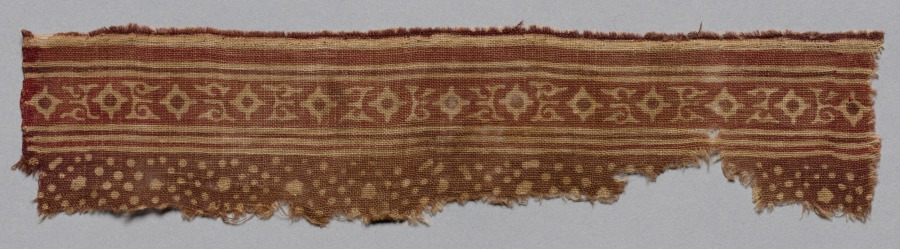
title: Fragment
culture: India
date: 1100s–1300s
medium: plain cloth, resist dyed; cotton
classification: Textile